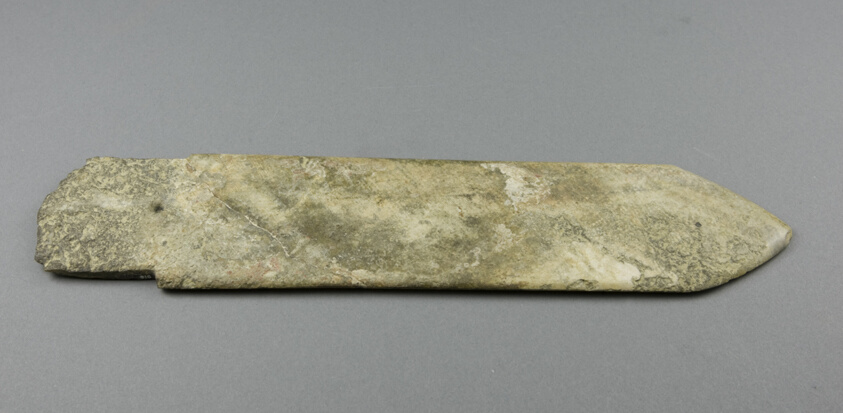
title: Dagger axe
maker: China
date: Shang dynasty (c.1600–1050 BC)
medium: Jade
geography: China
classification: jade; asian art